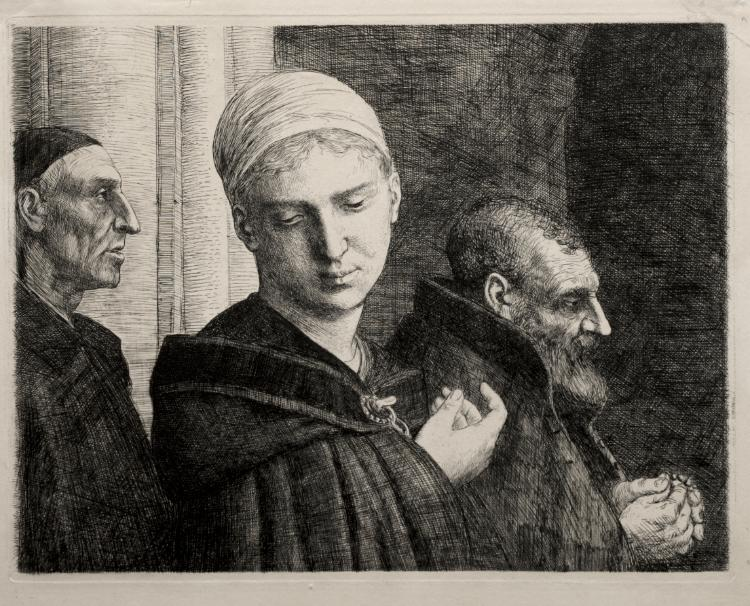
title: The Baptism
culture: France, 19th century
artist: Alphonse Legros (French, 1837–1911)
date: 1870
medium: etching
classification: Print